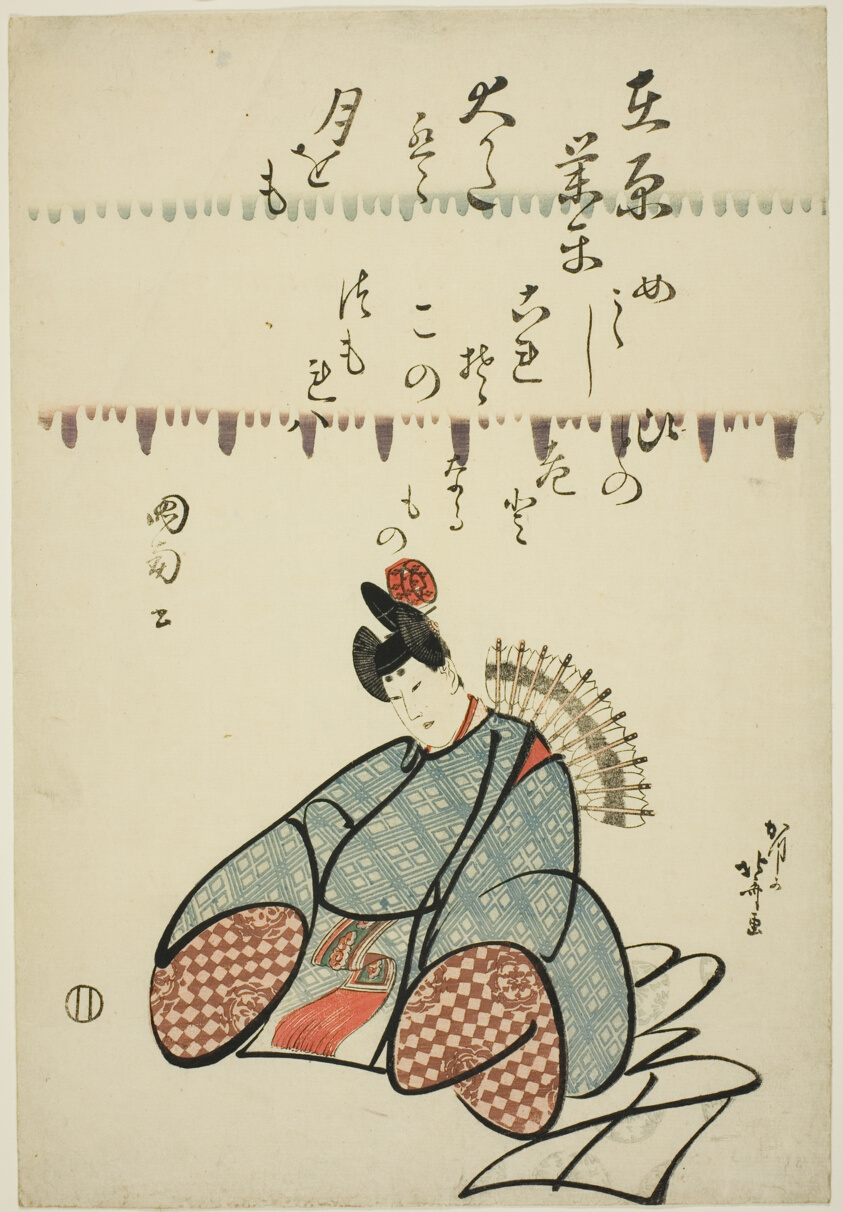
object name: Print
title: The Poet Ariwara no Narihira, from the series Six Immortal Poets (Rokkasen)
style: Japanese (culture or style)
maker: Katsushika Hokusai 葛飾 北斎; Japanese, 1760-1849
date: c. 1798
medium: Color woodblock print; oban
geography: Japan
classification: woodblock print; print; asian art